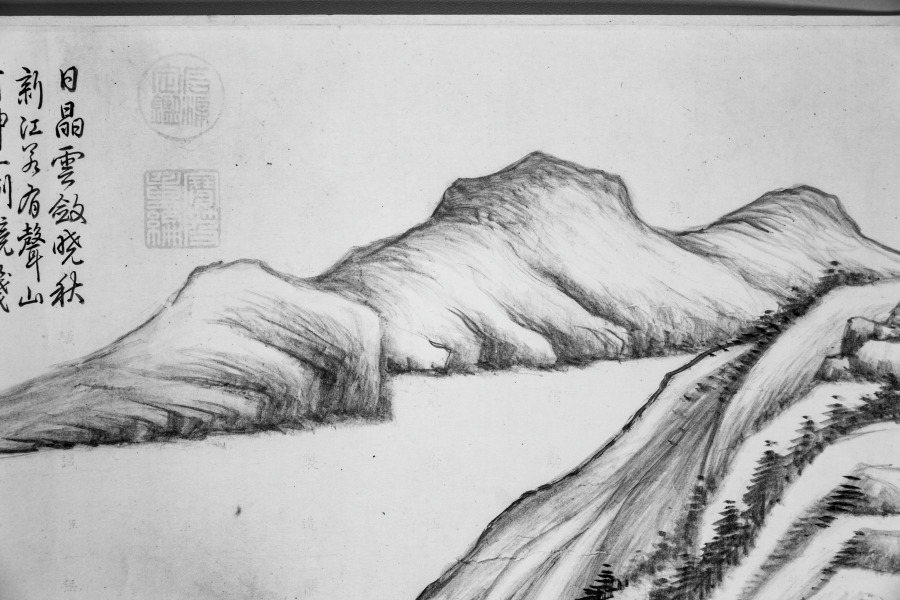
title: River and Mountains on a Clear Autumn Day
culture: China, Ming dynasty (1368–1644)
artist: Dong Qichang (Chinese, 1555–1636)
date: c. 1624–27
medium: Handscroll; ink on Korean paper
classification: Painting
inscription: 黃子久江山秋霽似此，當恨古人不見我也。思翁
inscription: 董文敏每遇高麗鏡面箋，書畫尤為入神。此卷改表紙用之，字跡隱然，兼有朝鮮之印。至於筆法圓秀，真接倪黃。豈文沈所可同日而語也。 康熙庚午中秋後一日，天氣澄爽，重裝初畢，跋於瓶廬。抱瓮翁高士奇。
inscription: Second inscription by Gao Shiqi 高士奇 (1645–1704): On the twenty-third day of the ninth month, the jiaxu year of the Kangxi era [1694], I packed my bags to head north. When my boat passed Wuchang [Suzhou], Mr. Mantang [Song Luo] brought wine to bid me farewell so that we could share our thoughts on our separation in the last few years. I showed him the paintings and calligraphy which I collected and asked his opinions. Since Mr. Mantang does not own any handscrolls by Wenmin [Dong Qichang], I leave this one for him in commemoration of our parting; thus the painting will have a worthy owner and our meeting will become a beautiful story in the future. It is the fourth day after the beginning of winter, with the sky clear and sober. Trees under frost have turned red and yellow, seemingly echoing the brush and ink in the painting. I also ask Mr. Mantang to inscribe a poem to commemorate our meeting so that it will survive forever.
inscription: 1 colophon and 4 seals of Song Luo 宋犖 (1634–1713): Who is the foremost art connoisseur of our dynasty?/ Tangcun [Liang Qingbiao, 1620–1691] is dead, so the title passes to Jiangcun [Gao Shiqi]./ Leaving office, you retired for five years in the Lake region./ Fondling handscrolls and hanging scrolls from morning to evening./ You sent me your collection catalogue Xiao Xia Lu last year;/ It is indeed the true equal of [Zhou Mi's] Yun Yan Guo Yan./ This year you returned to the capital by imperial order;/ Your boat with calligraphy and paintings anchored at the river bank in Suzhou./ When we met each other you did not waste any time for conversation by poured out immediately/ From your "coral net" extraordinary treasures./ You produced incomparable scrolls, with gold-inscribed labels and jade rollers,/ Pouring out from bags and trunks, they were spread in disarray./ Without a word, I rolled and unrolled until my fingers were numbed,/ We sat straight, facing each other quietly, and never felt tired./ For three days we forgot about sleeping and food./ And at times we shouted our joy out loud, forgetting who is host or guest./ Your Dwelling in the Fuchun Mountains and the Yuansheng manuscript/ These peerless works I myself examined with delight./ As an added pleasure to the farewell dinner under the Maple Bridge,/ You allowed me to hold again this handscroll by Dong Qichang--/ The Misty River and Piled Peaks [by Zhao Mengfu] and this Clear Autumn Day are two extraordinary masterpieces./ In showing such life and spirit with "qi yun." the artists were truly "men of heaven."/ The Clear Autumn Day is not even three feet long,/ Painted on tributary Korean paper, it shines like silver./ Every building up and every turn of the mountains imitates nature,/ Every tree and every rock is removed from the commonplace./ From the beginning, the theory of poetry is the theory of painting,/ Like the lotus and the morning sunshine, they complement and refresh each other./ The artist's inscription regrets that "the Old Masters cannot see my scroll."/ Huang Gongwang would have agreed in his grave./ The vermilion of the seals glitter and dazzles the eyes,/ These added accessories are as valuable as jade./ You are very kind to give it to me,/ The feelings expressed in your inscription are so sincere./ Wanting to refuse, but unable, I accept it to respect your wish,/ And taking off my gown and cap I wrapped it with care./ You asked me to write a long poem in commemoration of this beautiful occasion,/ I am too ashamed that my effort in response is so poor and inadequate./ Returning home, I unrolled it under candlelight, trying to write the colophon,/ The light of the waning moon shines at the foot of the mossy wall./ Earnestly humming and brows knit in deep thought, I try to compose;/ The verses are not outstanding, but the facts are real./ With this poem recorded at the end of the scroll, I mail it to you for approval,/ This poem and this painting shall outlast a thousand springs. (Translation by LYSL/HK/WKH)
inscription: 1 colophon and 2 seals of Shao Changheng 邵長蘅 (1637–1704); 2 inscriptions and 14 seals of the Qianlong 乾隆 emperor (r. 1736–95); 1 seal of the Jiaqing 嘉慶 emperor (r. 1796–1820); 3 seals of the Xuantong 宣統 emperor (r. 1908–11); 1 seal unidentified.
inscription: [印] 朝鮮國王之印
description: Dong Qichang had a tremendous impact on the artistic practices and historiography of later generations; his works and writings shaped literati aesthetics. Here, Dong places an abstract landscape composition diagonally across the picture plane, configured to recall earlier masters and simultaneously express his own personal style. Dong’s inscription claims, Huang Gongwang’s Autumn Day, looks like this. I truly regret the master has not seen my work. In fact, Dong Qichang may have had Dong Yuan’s Xiao and Xiang Rivers in mind, a work he owned and considered a key work in Chinese art history.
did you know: The painting has an imprint of a Korean seal that reads "Seal of the king of Joseon."